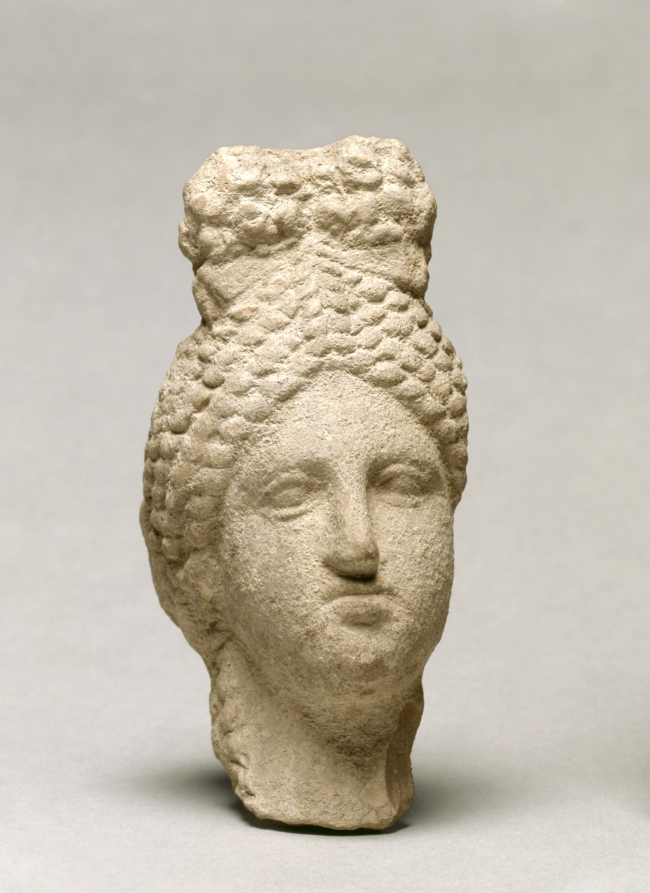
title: Woman's Head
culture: Greece, Sicily(?)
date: 300s BCE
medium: terracotta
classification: Sculpture